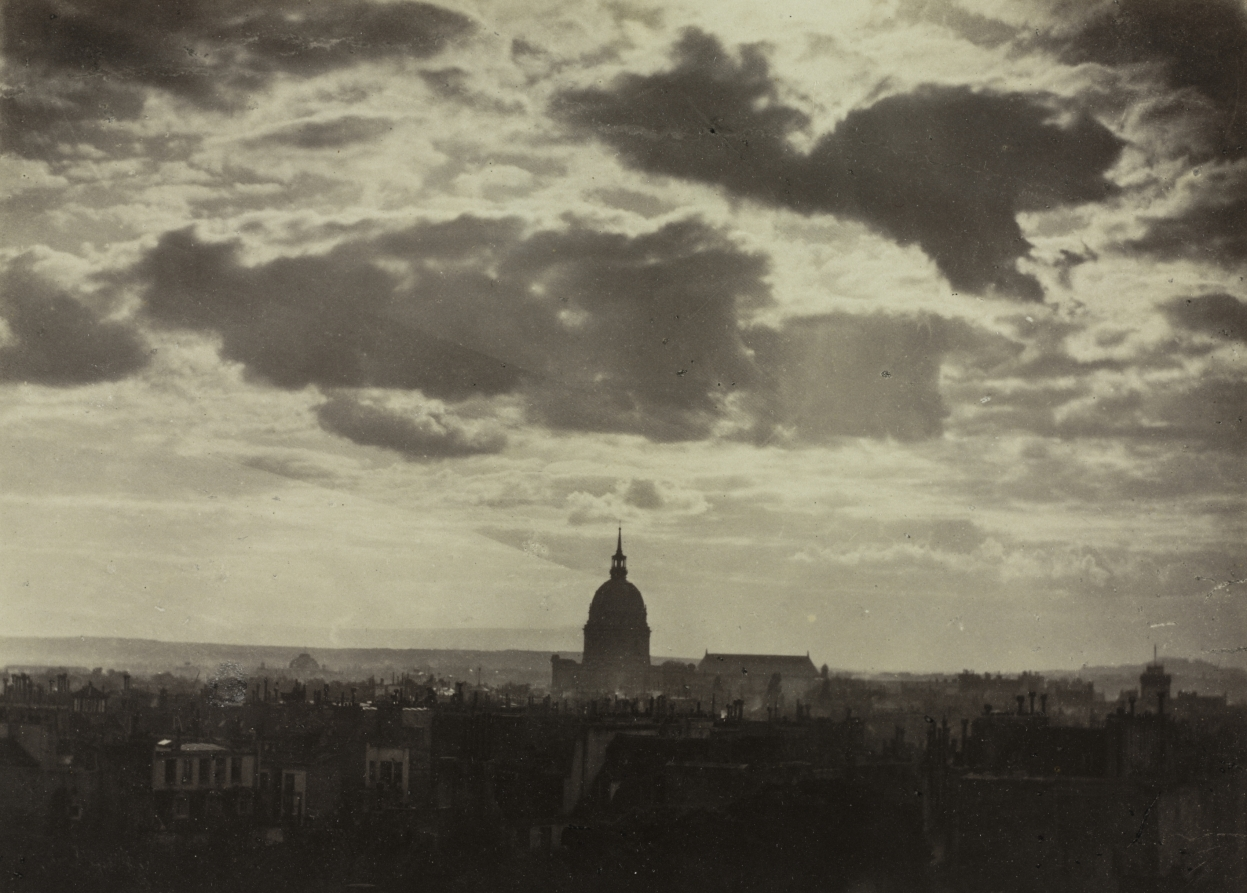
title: Sky Study, Paris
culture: France, 19th century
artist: Charles Marville (French, 1813–1879)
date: 1856–57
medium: albumen print from wet collodion negative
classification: Photograph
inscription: Written in pencil on recto: "1 [circled] 1 / no5 [boxed] / F [circled]"; in pencil on verso: "5 [circled]"; "#301"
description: Charles Marville made a series of photographs of the skies over Paris, some from various rooftops and some from his apartment window. This view frames the city so that the dome of the chapel of Les Invalides—a retirement home and hospital for military veterans—dominates the skyline. In the 1850s, the light-sensitive coatings for photographic plates were incapable of properly exposing both earth and the sky in a single shot. Marville here set his camera to capture the dramatic sky and clouds, which meant that the city below, for the most part, became a dark mass of undifferentiated buildings. The scale, drama, and majesty of this natural spectacle overwhelm human achievements.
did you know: Charles Marville made a series of views of the skies over Paris, some from various rooftops and others from his apartment window.